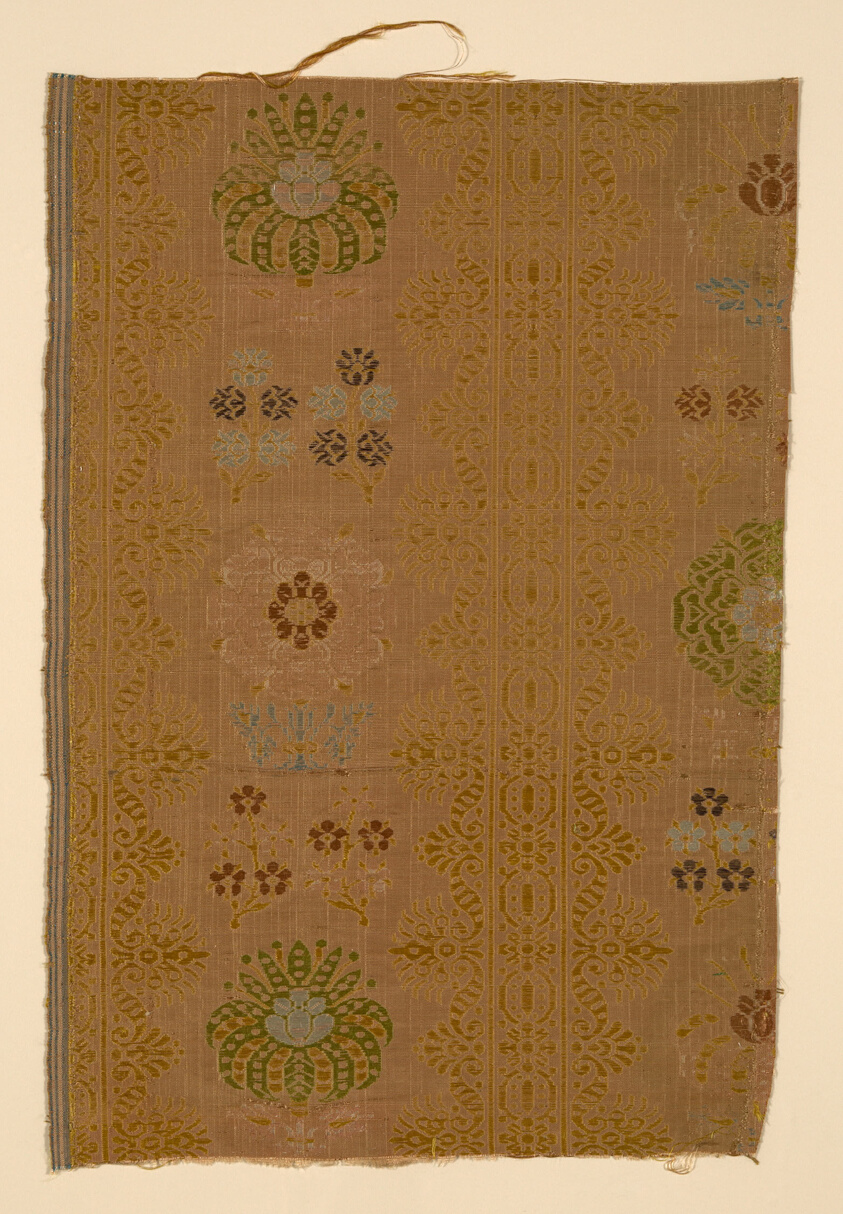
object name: Textile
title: Fragment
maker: Italy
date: 17th century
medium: Silk, warp-faced plain weave with supplementary patterning wefts and supplementary brocading wefts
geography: Italy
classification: textile; weaving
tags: floral arrangements